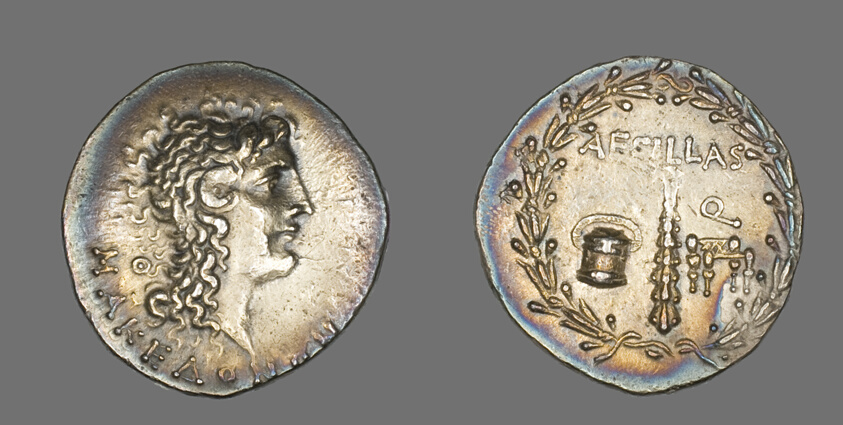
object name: Coin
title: Tetradrachm (Coin) Portraying Alexander the Great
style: roman (ancient, style or period), ancient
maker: Roman, minted in Thessalonike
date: 92-88 BCE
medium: Silver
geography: Roman Empire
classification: coin; ancient art